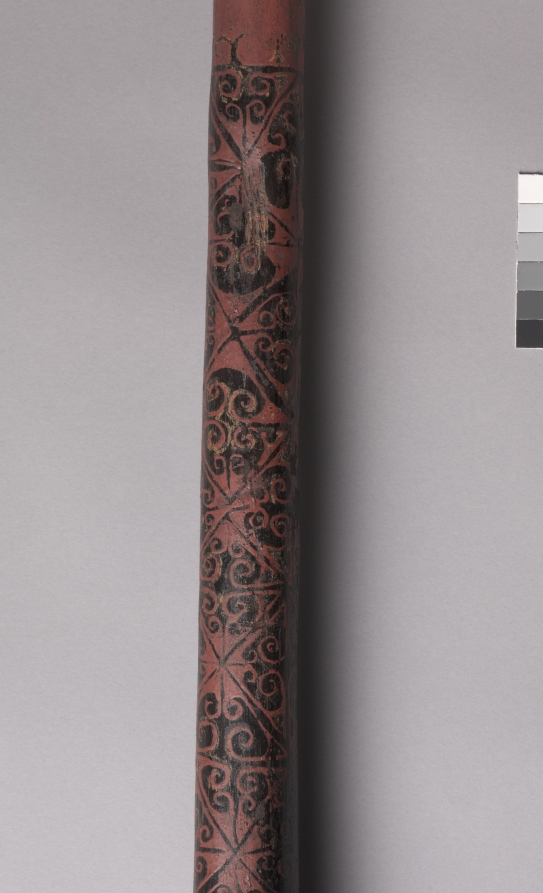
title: Cranes and Serpents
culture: China, reportedly from Hunan province, Changsha, Warring States period (475–221 BCE), State of Chu (c. 1046–223 BCE)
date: 475–221 BCE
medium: lacquered wood with polychromy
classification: Sculpture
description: A different style of ritual art developed in the state of Chu in South China. In addition to bronze vessels, lacquered wood artifacts expanded the repertory of ritual implements. This extraordinary sculpture was probably a drum stand for supporting a suspended drum in ritual ceremonies. It is unique among other excavated drum stands of the Chu, which typically show two birds standing on tigers. The theme of the bird stepping on the serpent was common in the Chu visual culture. Yet the slender proportions and seemingly flimsy structure of this particular set raise the question of whether it was utilitarian or mostly served symbolic functions in the tomb. The birds' and serpents' bodies have designs painted in red lacquer and yellow pigment against the black lacquer. Scientific analyses confirm the additional use of a blue or green pigment that has been discolored over time.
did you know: The cranes' long necks allowed a lightweight drum to be suspended from strings through the beaks, while the densely intertwined snakes provided a weighty base to stabilize the object during musical performances.